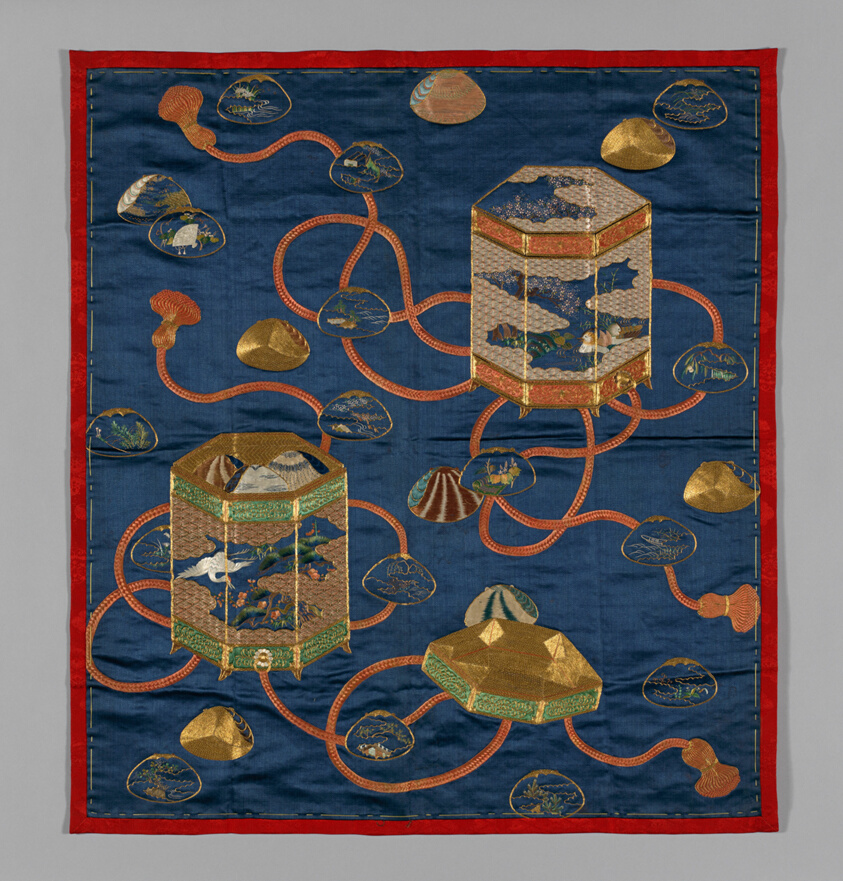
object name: Textile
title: Fukusa (Gift Cover)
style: late edo, edo (japanese period), Japanism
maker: Japan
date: Edo period (1615–1868), 1775/1825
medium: Silk, satin weave (shusu); embroidered with silk and gold-leaf-over-lacquered-paper-strip-wrapped cotton in individual back, bullion, chain, eyelet, fern, herring bone, open fishbone, single satin, satin, silk-padded satin; surface satin and stem stitches; laid work and couching; lined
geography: Japan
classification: textile; weaving; needlework (visual works)